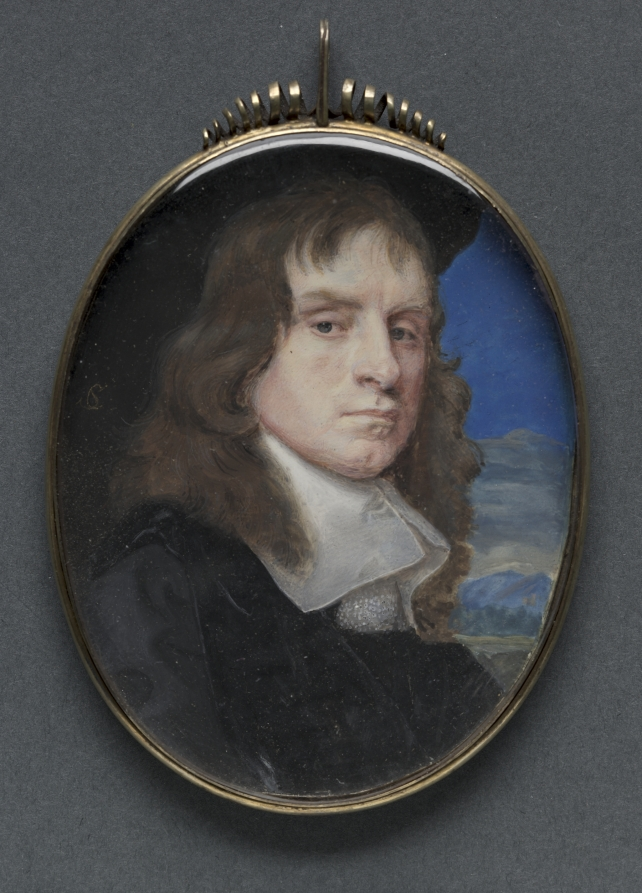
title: Portrait of a Man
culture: England, 17th century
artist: Samuel Cooper (British, 1608/09–1672)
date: c. 1655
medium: watercolor on vellum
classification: Portrait Miniature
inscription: signed left: SC [monogram]